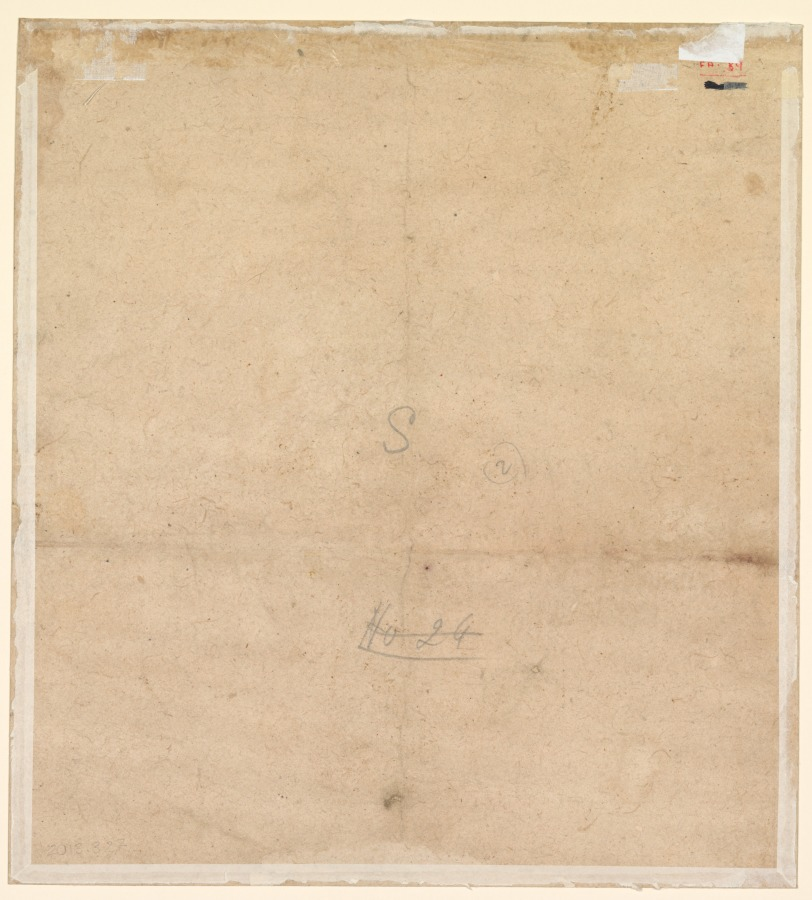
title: Portrait of Murad Bakhsh (1624–61)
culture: Mughal India, court of Shah Jahan (reigned 1628–58)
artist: attributed to Balchand (Indian, active 1595–c. 1650)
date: c. 1635; borders c. 1700s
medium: gum tempera and gold on paper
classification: Painting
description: The miniature portrait of a Mughal prince is now mounted on an album page. Originally, it was in a gemstone setting as a “portrait jewel” to be worn by family and supporters at court. India’s ruling elite had been wearing portrait jewels since Sir Thomas Rowe (about 1581–1655) presented British portrait miniatures and cameos to the Mughal emperor as part of a diplomatic gift in 1616, when he successfully negotiated for British access to India’s ports.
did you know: This portrait belonged to a cousin of Sir Winston Churchill.